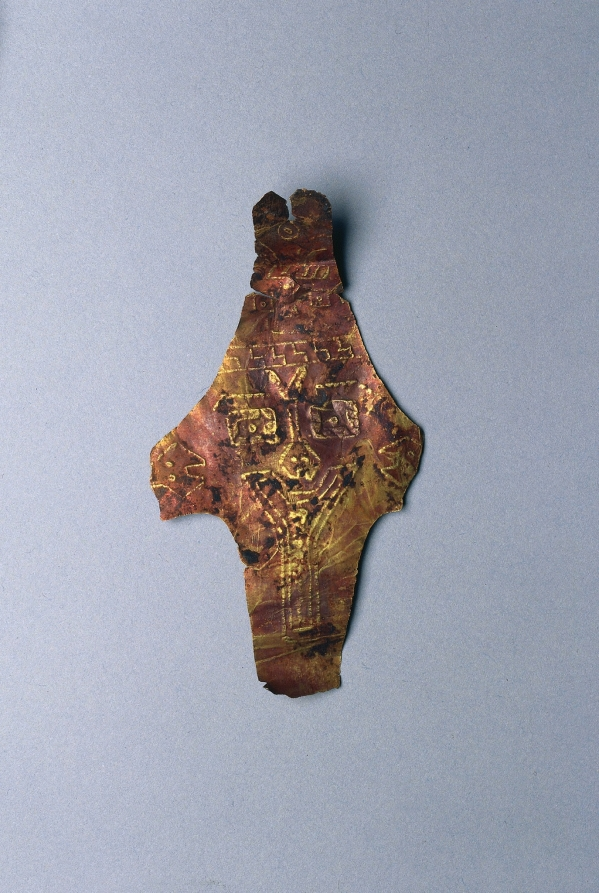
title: Ornament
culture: Peru, South Coast, Ica Valley?, Paracas, c. 300 BC-AD 100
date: c. 300 BCE–100 CE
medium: hammered and embossed gold-copper alloy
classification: Jewelry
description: With its grinning mouth and long, protruding tongue, the face embossed on this fragmentary ornament resembles linear images painted on mummy masks and woven on doublecloth tunics and mantles. Both painted mummy masks and doublecloth garments are most often found in the Ica Valley, a short distance south of the Paracas Peninsula. The ornament's original function is uncertain.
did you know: Tumbaga is an alloy made by blending gold with copper, which may give the gold a rosy hue.